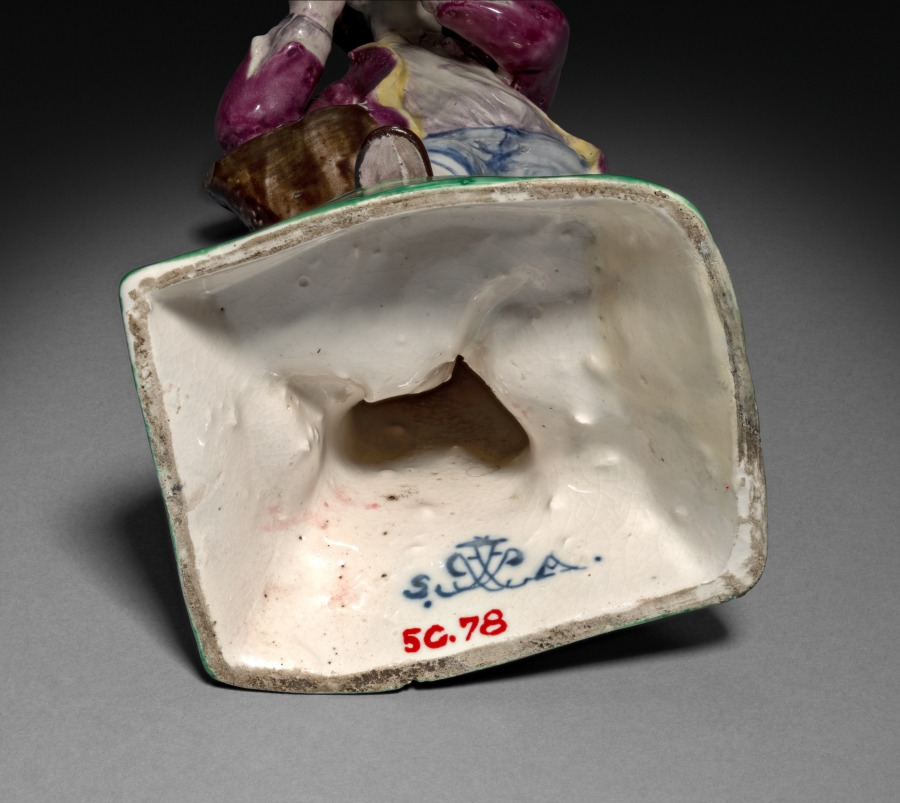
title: Boy Playing a Flute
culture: France, 18th century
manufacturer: Saint-Amand-les-Eaux (French)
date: 1760–1770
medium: faience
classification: Ceramic